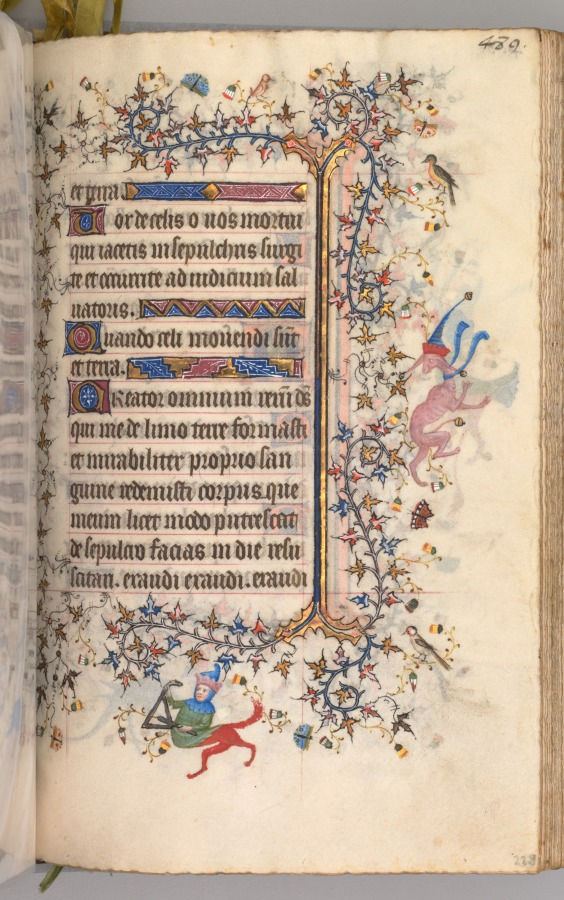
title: Hours of Charles the Noble, King of Navarre (1361-1425): fol. 239r, Text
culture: France, Paris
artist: Master of the Brussels Initials and Associates (French)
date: c. 1405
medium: ink, tempera, and gold on vellum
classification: Bound Volume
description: This precious volume was obviously highly prized by its owner, the French-born King of Navarre, who had his coat of arms painted on no less than twenty folios. Rather than directly commissioning this manuscript from a specific workshop, it seems that Charles the Noble acquired his book of hours -- perhaps ready-made for the luxury market -- while on a trip to Paris in 1404-05. A collaborative effort, six painting styles are evidenced within the pages of this codex, those of two Italians, two Frenchmen, and two Netherlanders. The painter who was responsible for the planning and decoration of the book, and who produced seventeen of the large miniatures, was a Bolognese artist known as the Master of the Brussels Initials. His principal assistant, responsible for most of the borders, was a Florentine who signed his name "Zecho" da Firenze on folio 208 verso.